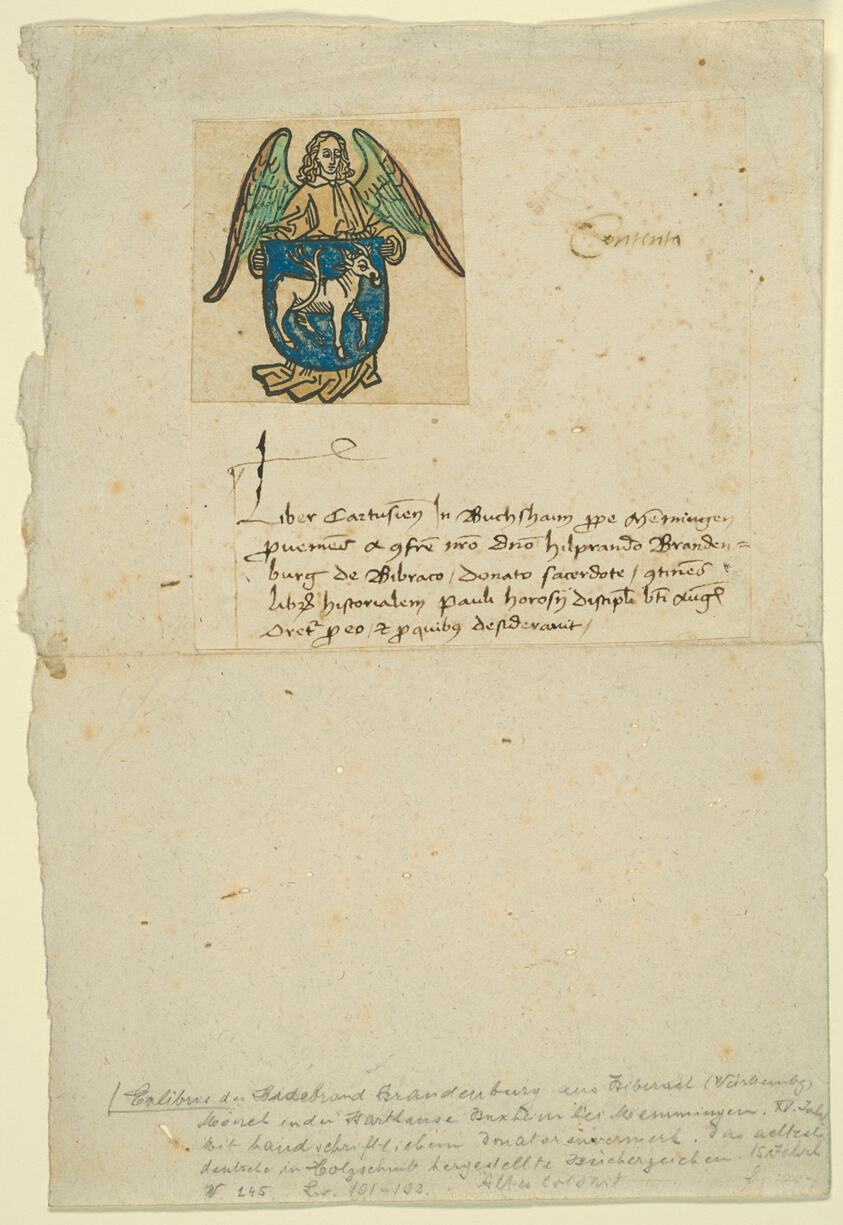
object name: Print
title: Bookplate of Hildebrand von Brandenburg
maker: Artist unknown; German, late 15th century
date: c. 1470–80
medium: Woodcut in black with hand coloring on cream laid paper, laid down on cream laid paper, with inscription in pen and brown ink, laid down on cream laid paper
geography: Germany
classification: woodcut; print; prints and drawing